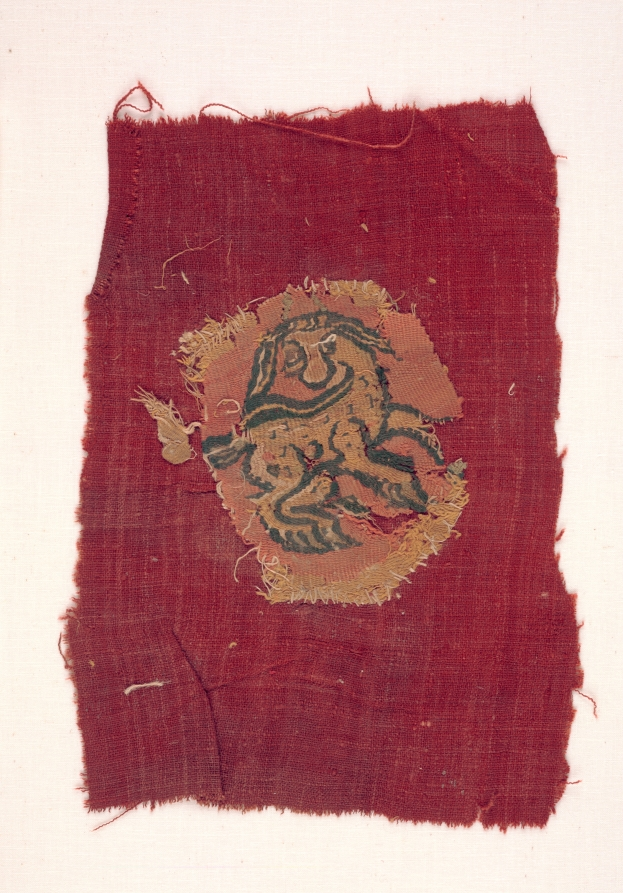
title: Fragment of an Oval Segmentum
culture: Egypt, 7th - 8th century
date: 600s - 700s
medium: tapestry (originally inwoven in tabby ground); linen and wool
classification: Textile